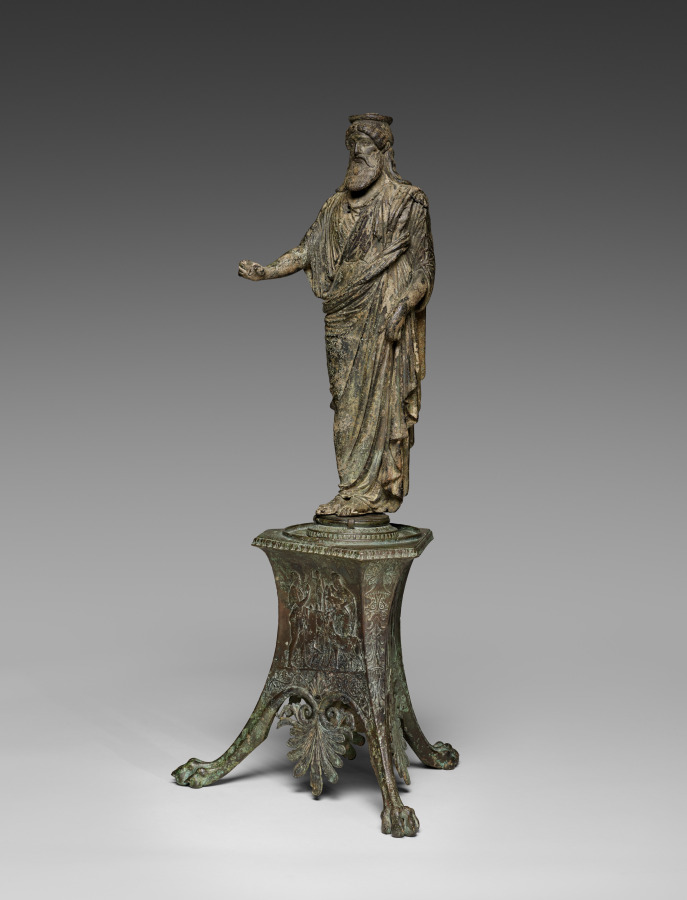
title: Tripod Base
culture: Italy, Roman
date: 100–1 BCE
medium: bronze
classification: Sculpture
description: This unusual tripod base features three clawed feet, an abundance of vegetal ornament, and three different figural scenes in low relief. Two seem to show sanctuary settings: first, a small Archaistic statue of Athena flanked by a woman with small offerings and a man holding a kid and leading two goats; and second, a small youthful male statue behind two beardless figures—perhaps Apollo, with a stag, and Dionysos, holding a thyrsos. The third scene shows Herakles, holding a club while leading a woman, maybe Auge or Alcestis. Although perhaps similarly eclectic in style, the base and the sculpture it now supports differ in their alloys and patinas.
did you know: This elaborate base may have originally supported an ornate lamp (not the statuette now displayed atop it).